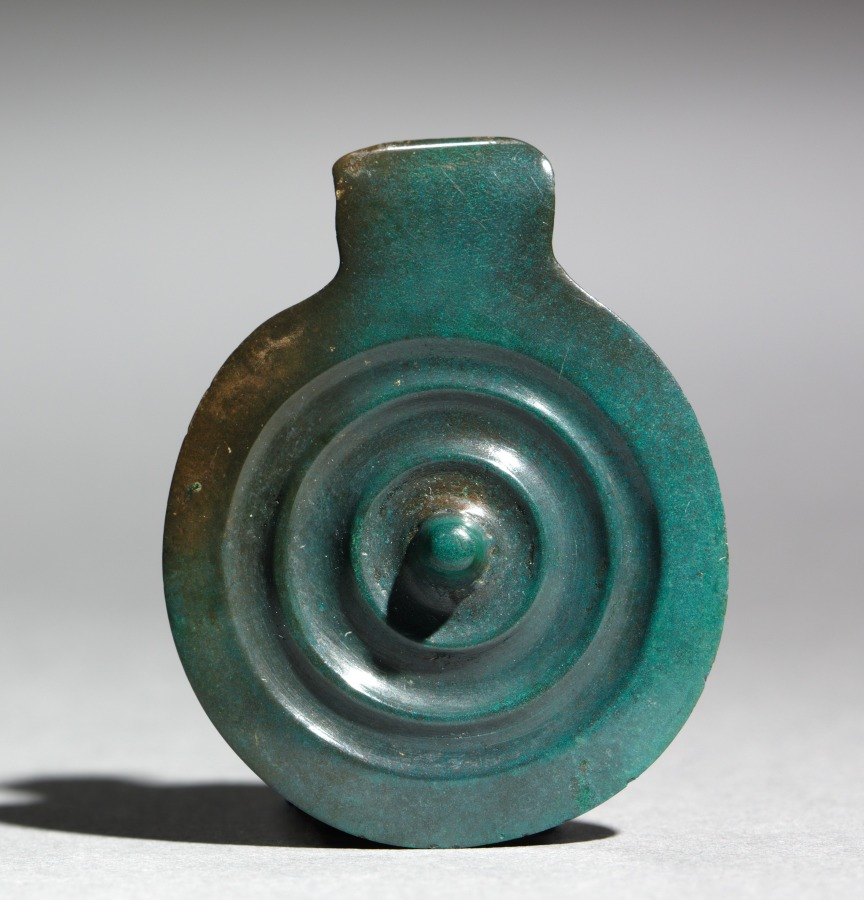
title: Elements from a Necklace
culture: possibly Hungary, Bronze Age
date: c. 1400–1300 BCE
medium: bronze, cast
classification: Jewelry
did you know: The cast bronze necklace pendants are partially oxidized, revealing a green patina.